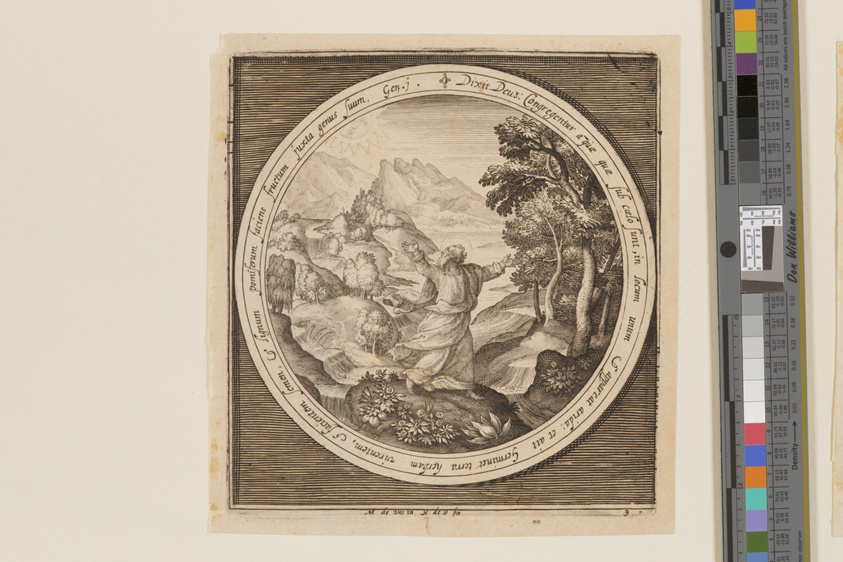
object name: Print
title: Third Day: The Creation of Land and Vegetation, from The Creation to the Expulsion from Paradise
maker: Nicolaes de Bruyn (Flemish, 1571–1656); after Maarten de Vos (Flemish, 1532–1603)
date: c. 1610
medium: Engraving on ivory laid paper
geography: Flanders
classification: engraving; paper; print; prints and drawing